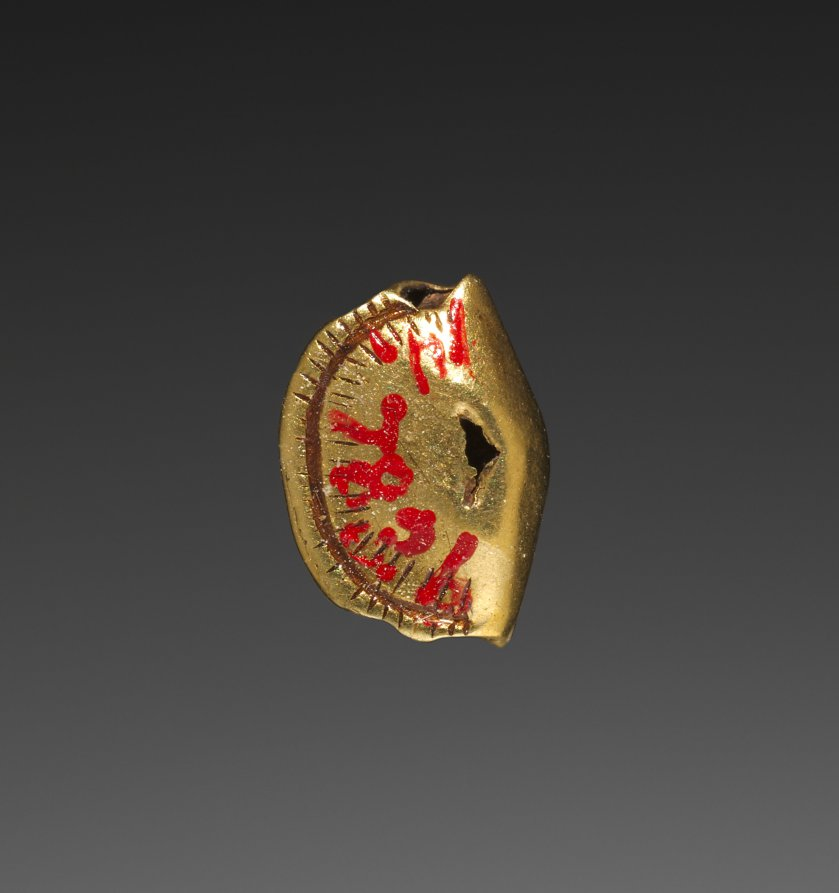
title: Wallet Bead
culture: Egypt, New Kingdom (1540–1069 BCE), Dynasty 18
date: 1540–1296 BCE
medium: gold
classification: Jewelry